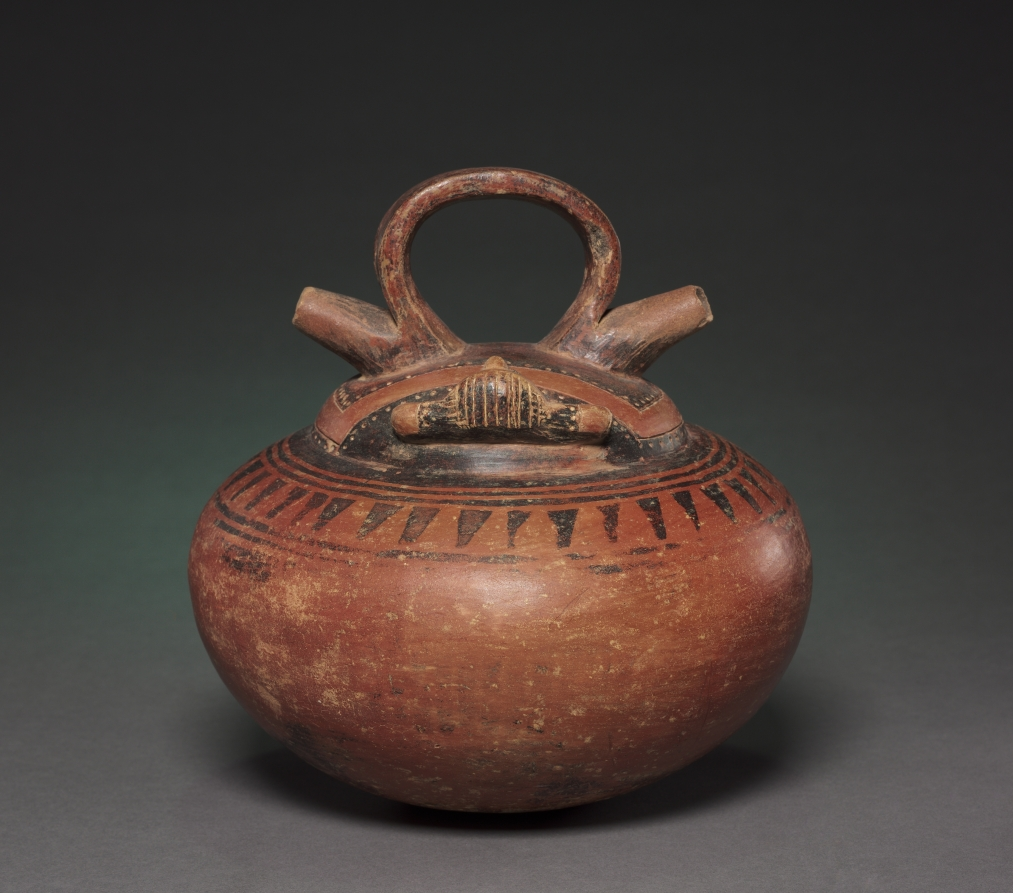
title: Double-Spouted Vessel with Reclining Figure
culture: Colombia, Calima region, Yotoco style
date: c. 1–800 CE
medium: ceramic, slip, resist paint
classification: Ceramic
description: This headdress ornament reveals a considerable flair for showmanship through its size and many suspended parts, which would have swayed and glittered with the wearer's motion. Like many other Yotoco ornaments, it features an enigmatic human face with closed eyes, a huge nose ornament that hides the lower face, and great disks that dangle from the ears.